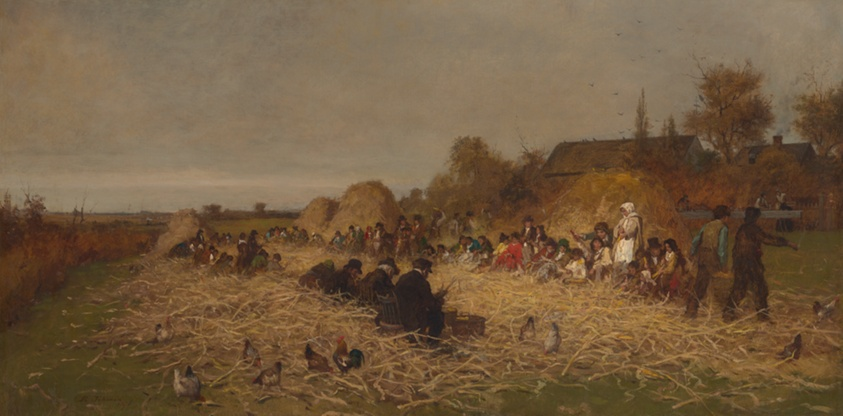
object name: Painting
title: Husking Bee, Island of Nantucket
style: Realism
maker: Eastman Johnson (American, 1824–1906)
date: 1876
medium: Oil on canvas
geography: Nantucket Island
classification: painting; american arts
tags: landscapes, animals